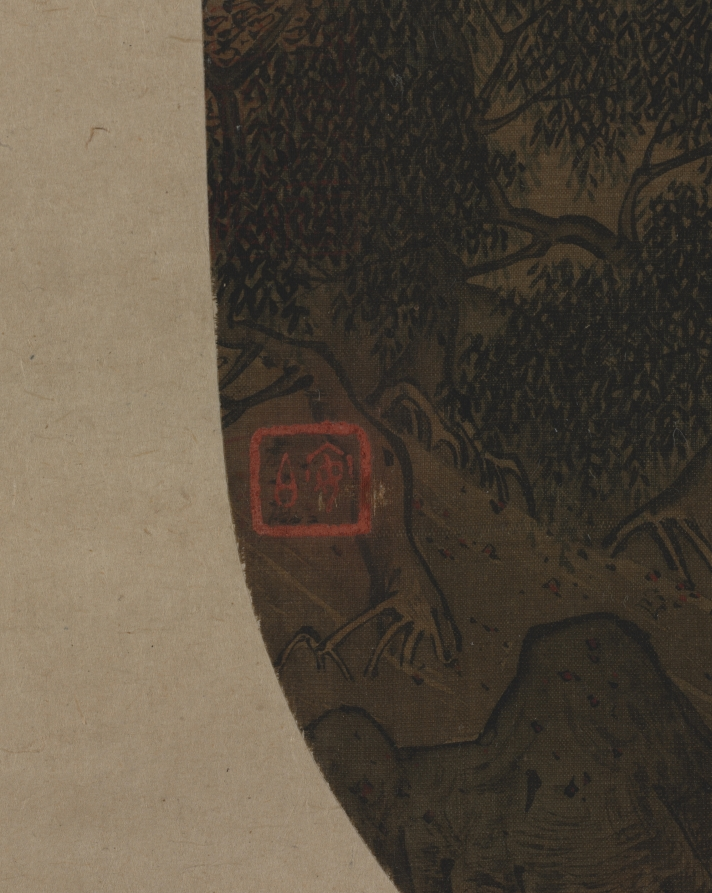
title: Buffalo and Boy in Autumnal Landscape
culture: China, Southern Song dynasty (1127-1279)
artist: Yan Ciping (Chinese, active 1164–1187)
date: 1127–1279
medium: album leaf; ink and light color on silk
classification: Painting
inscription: 5 seals: 3 unidentified; 2 indecipherable.